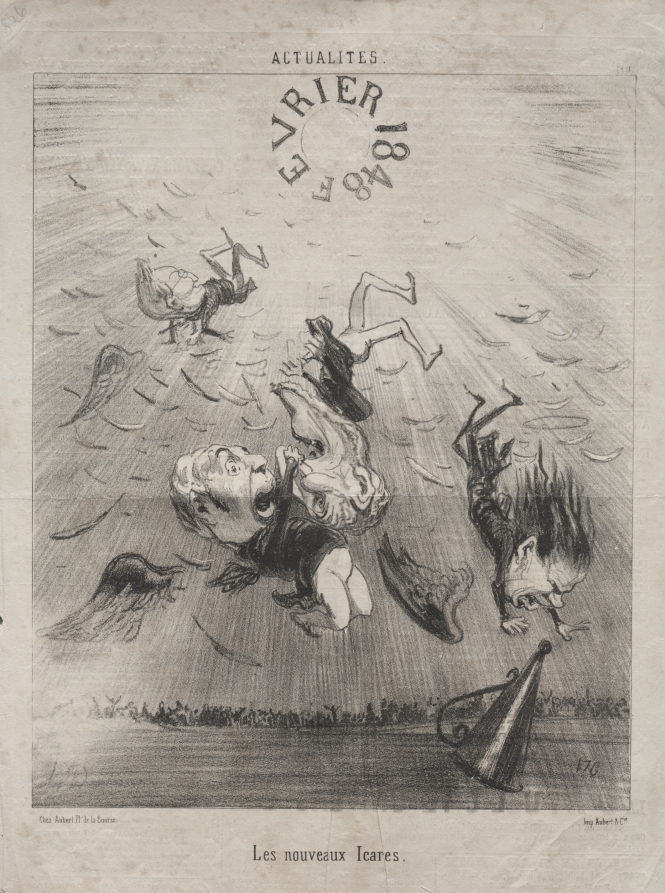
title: The new Icarus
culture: France, 19th century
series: News of the Day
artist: Honoré Daumier (French, 1808–1879)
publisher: Aubert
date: 1850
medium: lithograph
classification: Print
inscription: Upper margin, pencil: 826 ; Lower margin, pencil: VI 2013 / 47.319 / II/II / D.VI 2013 ; Lower margin, printed: Chez Aubert Pl. de la Bourse. / Imp. Aubert & Cie.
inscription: Above image, printed: ACTUALITÉS. / 140 ; Below image, printed: Les nouveaux Icares.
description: This print was published in Le Charivari (June 7, 1850) as plate 140 from the series News of the Day.